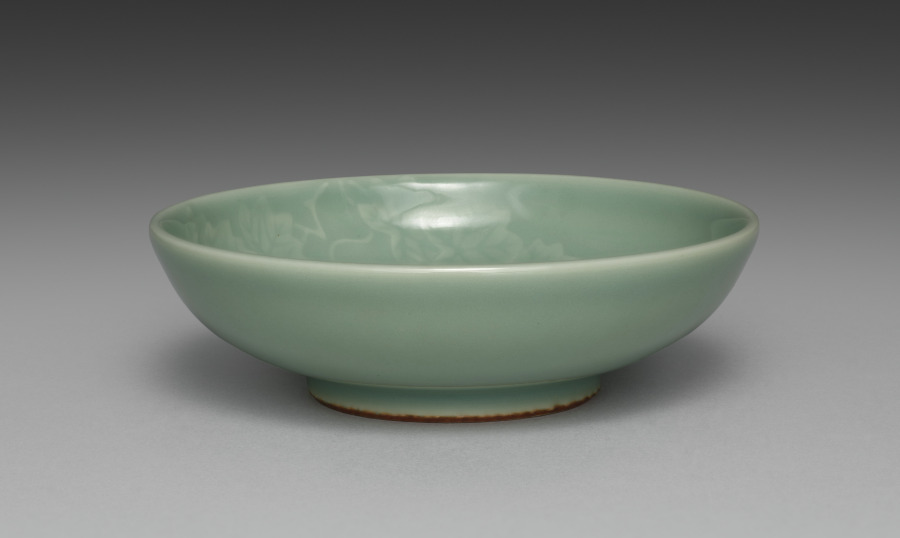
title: Dish from Dishes with Ivy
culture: Japan, Meiji period (1868–1912)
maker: Seifū Yohei III (Japanese, 1851–1914)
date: 1893–1914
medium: One from a set of five dishes; porcelain with green glaze and molded designs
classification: Ceramic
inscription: 清風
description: Yohei III’s main output for his sophisticated clientele was in the form of tea sets and dining sets. He often produced in pairs, sets of five, or sets of ten. This set of five dishes with a green glaze and designs of ivy vines in very low relief has unfortunately lost its box. These dishes are slightly larger than the other dishes, like CMA 2022.187, and so may have been not saucers but rather small plates for meals.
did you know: In his career, Seifū Yohei III created a range of dishes in green glazes.